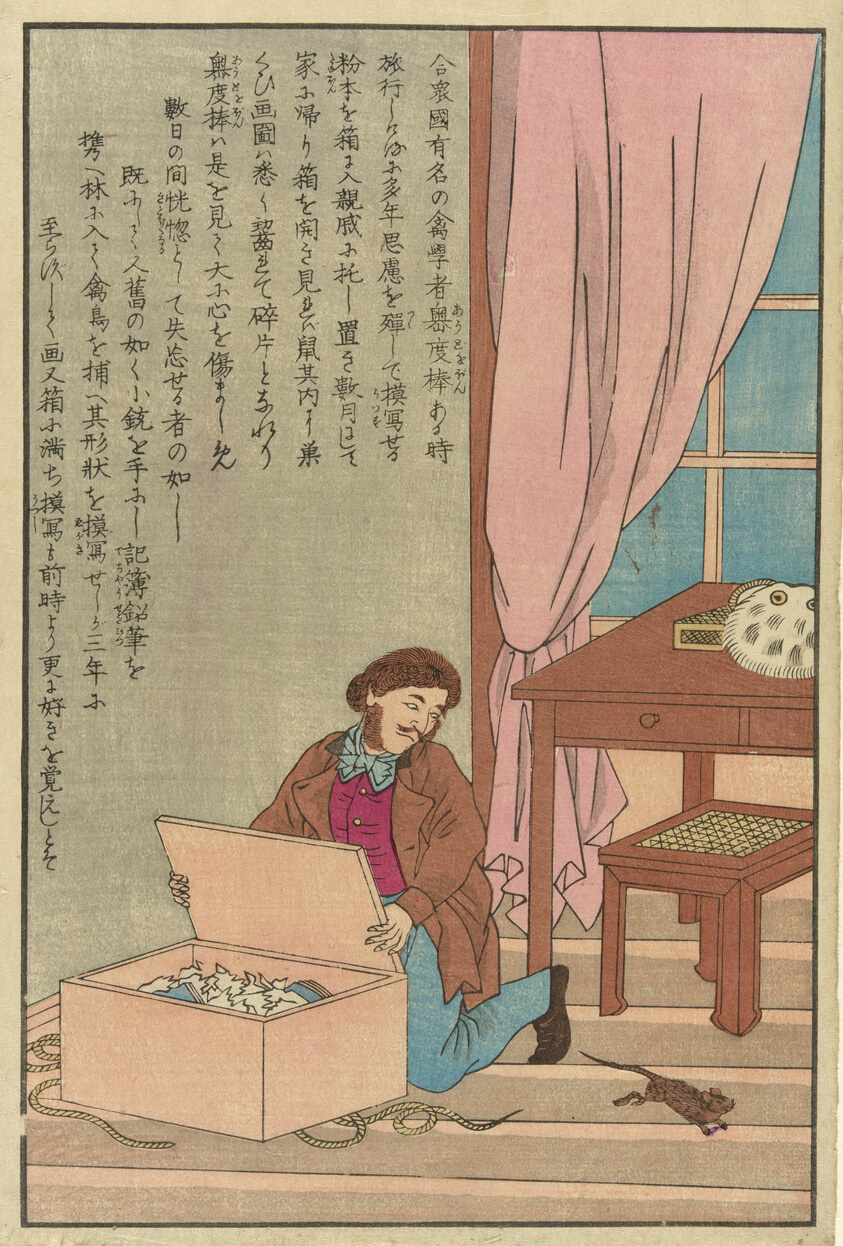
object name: Print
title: John James Audubon discovering his drawings eaten by a rat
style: Japanese (culture or style)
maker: Artist unknown; Japanese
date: 1870s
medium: Color woodblock print; oban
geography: Japan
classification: woodblock print; print